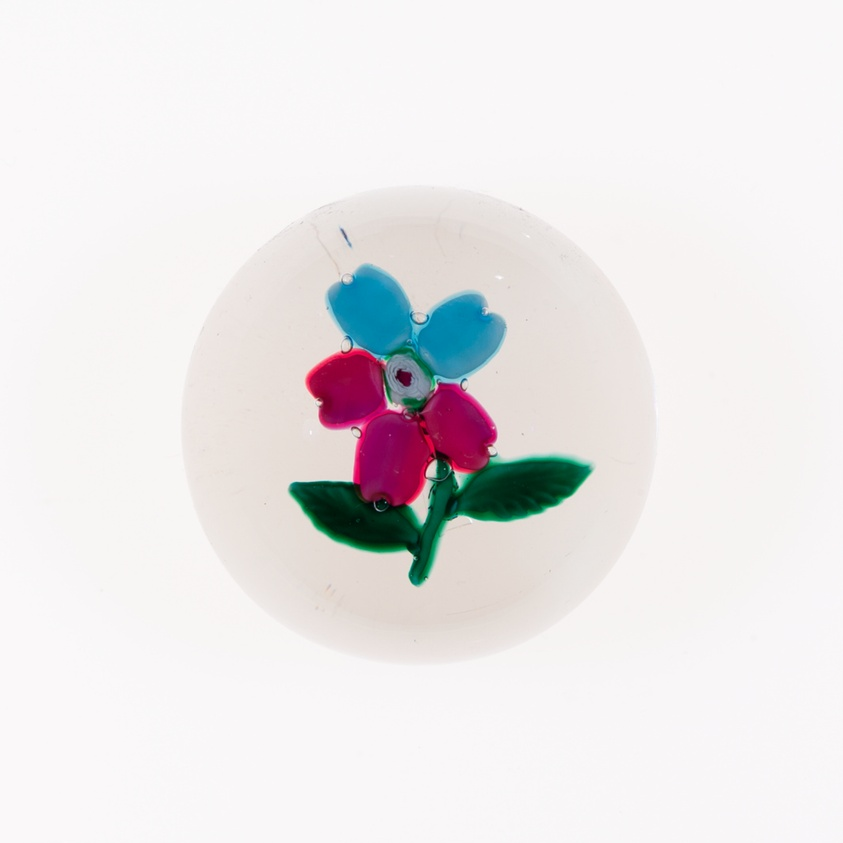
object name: Glass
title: Paperweight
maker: Boston and Sandwich Glass Company (Sandwich, Massachusetts, 1826-1888)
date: Late 19th century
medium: Glass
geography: United States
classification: paperweight; glass